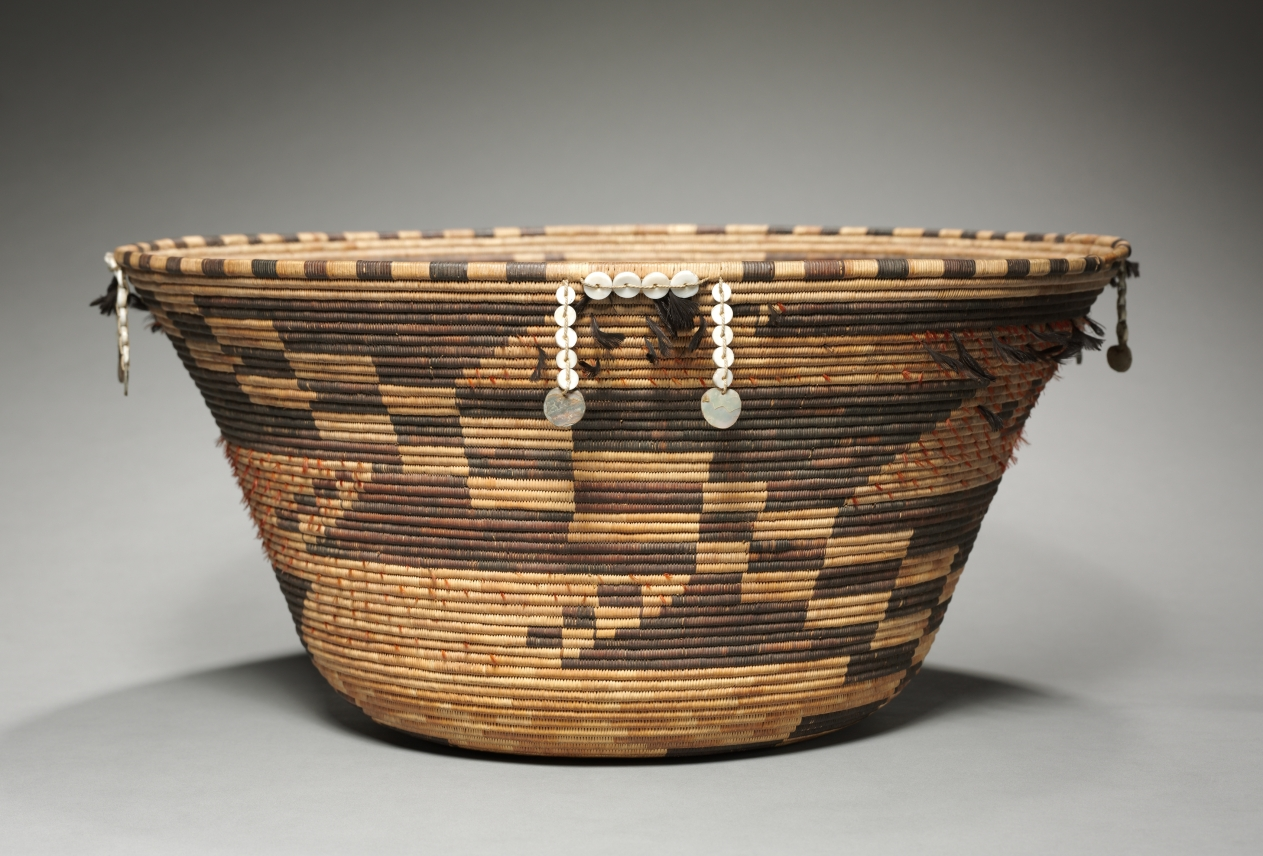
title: Puberty Basket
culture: California, Pomo, late 19th century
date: 1890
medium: coiled, quail and woodpecker feathers, shell, abalone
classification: Basketry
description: This finely woven basin is based on a traditional form that young Pomo women used to wash themselves after ceremonial seclusion following their first menses. The example on display, however, was made for the outside market.